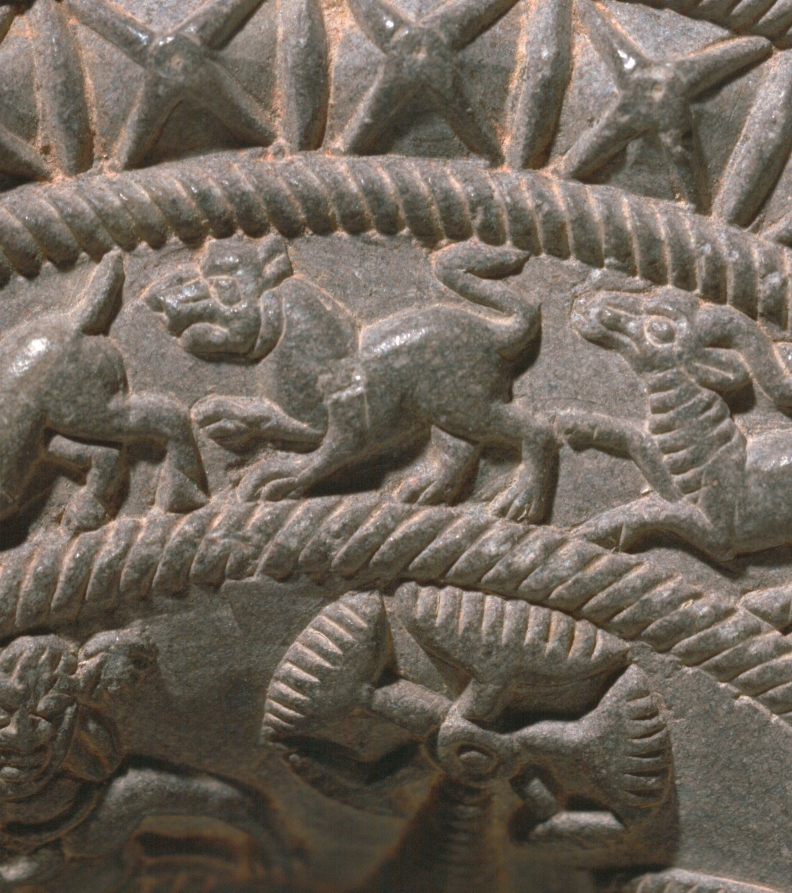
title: Ringstone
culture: India, Maurya period (322–185 BCE)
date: 200s BCE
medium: steatite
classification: Sculpture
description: Ringstones are among the earliest works of art to be created in stone during India's historical period. This example is finely carved with detailed images of affectionate couples and palm trees, running animals, and geometric motifs in concentric circles. The function of ringstones remains uncertain, since none of the surviving examples is inscribed or explained in a text.